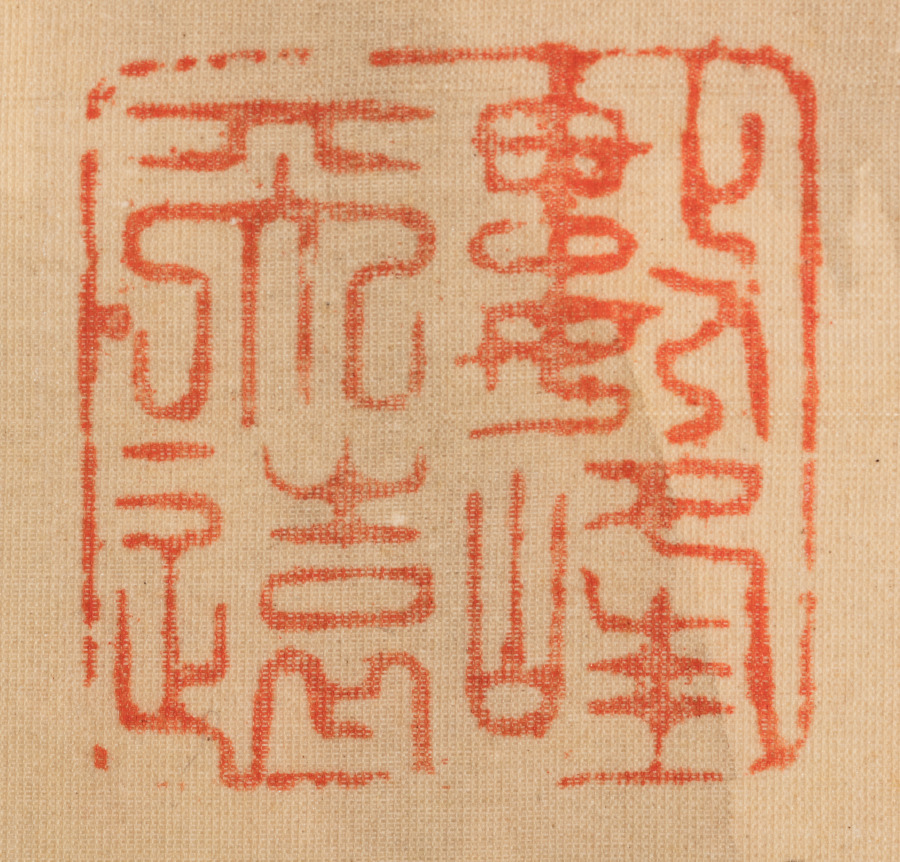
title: Orchids and Rocks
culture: Korea, Joseon dynasty (1392–1910)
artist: Yi Ha-eung (Korean, 1820–1898)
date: 1897–98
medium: Eight-panel folding screen; ink on silk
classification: Painting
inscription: Translation: [I] painted for the high minister Yangwon. [I] humbly request your corrections and advice [on my painting]. [By] an eighty-year old gentleman of rocks.)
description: Yi Ha-eung (1820−1898), the artist of this eight-panel folding screen, was one of the most influential men in late 19th-century Korea. Acting as the regent for his son, King Gojong (1852−1919), who ascended the throne at the age of thirteen, Yi ruled Korea from 1866 to 1873. In addition to his illustrious political career, Yi was also recognized as one of the most celebrated artists who led the revival of literati art in late 19th-century Korean art. In particular, he was recognized as the master of orchids, one of the “Four Gentlemen” (plum, orchid, chrysanthemum, and bamboo) themes. Solely relying on monochrome ink, Yi depicted the curvilinear silhouettes of cymbidium orchid leaves dramatically hanging down from cliffs. Growing in wilderness and redolent with fragrance, orchids were often associated with the perseverance of principled gentlemen, and thus became one of the most popular subjects of scholar-artists' paintings.On the upper right corner of the far left panel, Yi wrote a short inscription stating that he painted the work at the age of 80.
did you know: The artist of this elegant painting is the formidable politician Yi Ha-eung (1820–1898), who is known for a seclusion policy that aimed to protect Korea and its sovereignty from foreign influences.